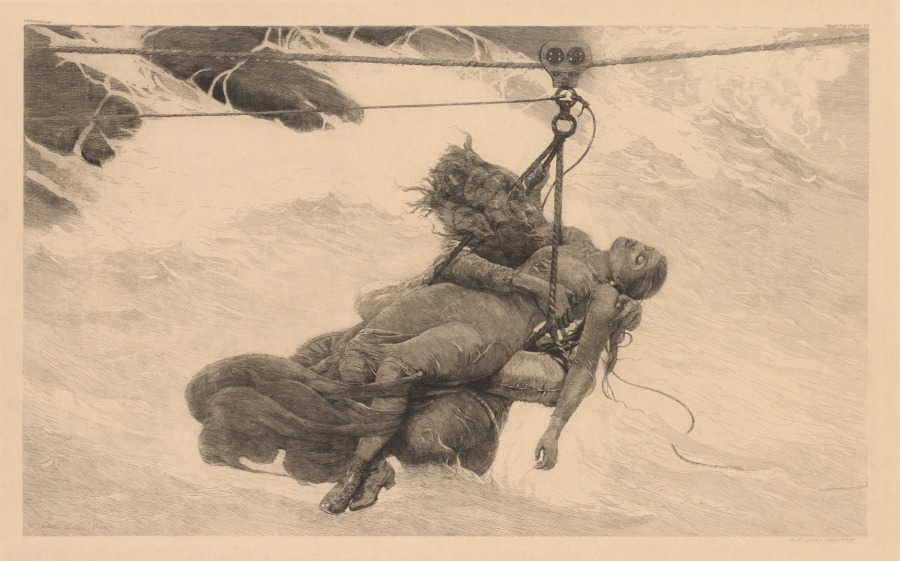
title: Saved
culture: America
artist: Winslow Homer (American, 1836–1910)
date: 1889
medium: etching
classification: Print